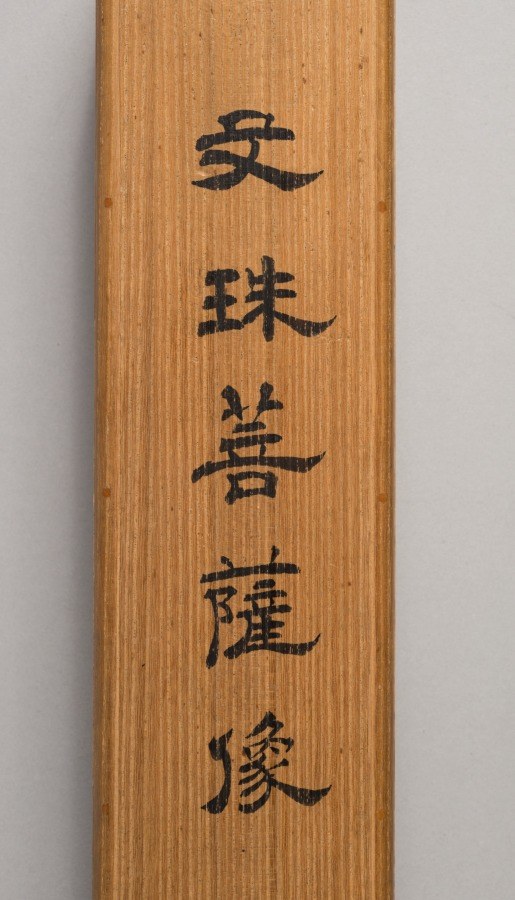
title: Monju with Five Hair Knots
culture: Japan, Kamakura period (1185–1333)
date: late 1200s–early 1300s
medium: Hanging scroll; ink, color, gold, and cut gold on silk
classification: Painting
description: This Buddhist painting shows Monju, Manjushri in Sanskrit, riding a lion. Monju is a bodhisattva, a being who, though enlightened, chooses not to become a Buddha but instead helps others achieve enlightenment. Monju’s youthfulness symbolizes his pure wisdom, unsullied by the world, and his five hair knots represent his vow to keep calamity at bay. The supernatural nature of his lion is emphasized by its hair, every strand painted in gold, as well as by the lotus platforms beneath each of its feet. The boy’s bejeweled body and silk finery is meant to resemble that of an Indian prince.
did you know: This painting is exemplary of the Kamakura period, known for artworks with special attention paid to the realism of images.